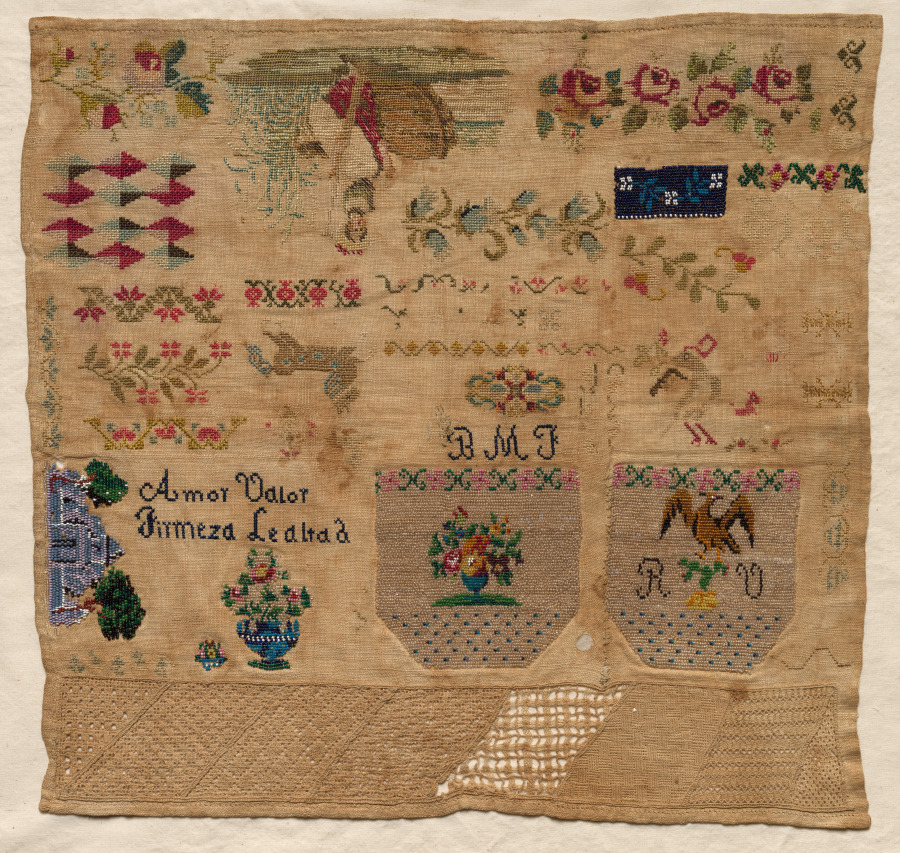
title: Sampler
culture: Mexico, 19th century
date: 1800s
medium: embroidery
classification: Sampler